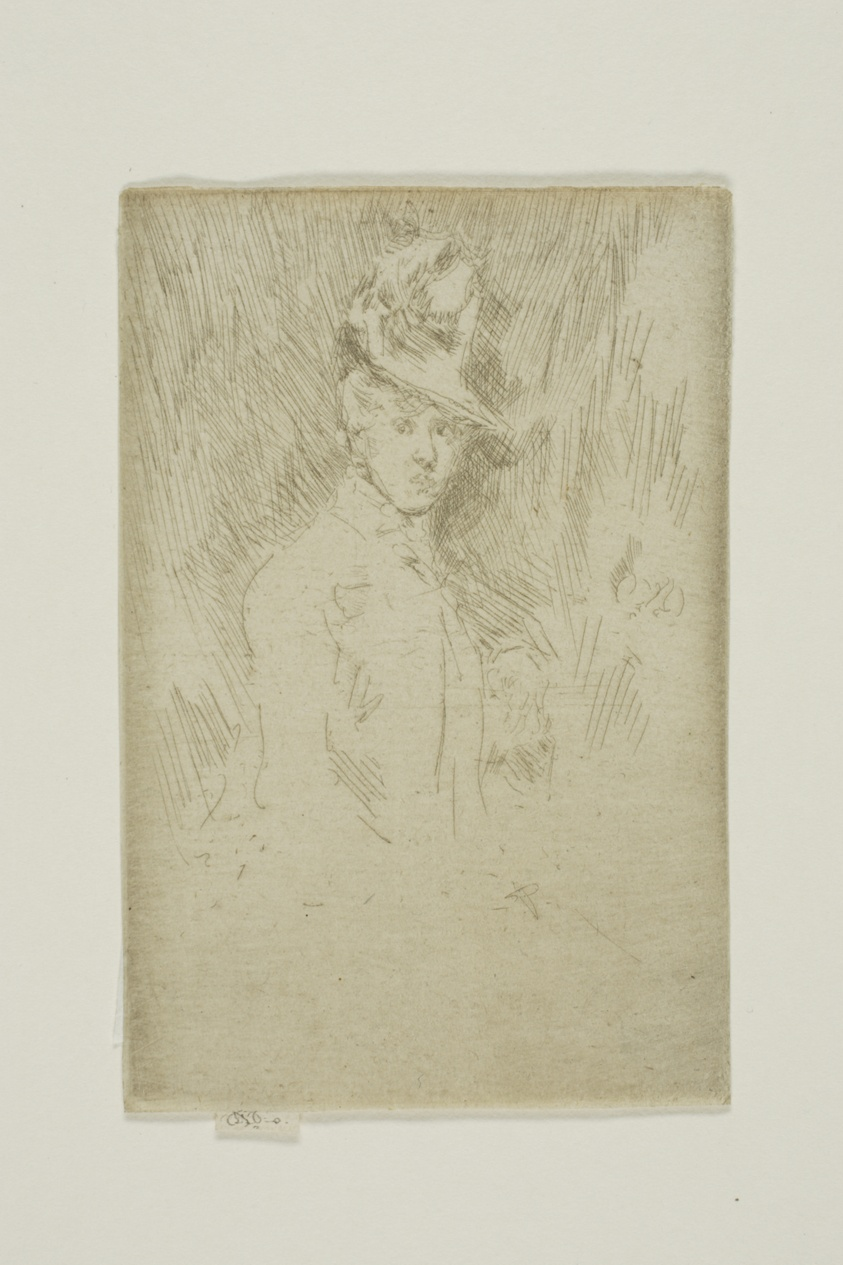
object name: Print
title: The Little Hat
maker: James McNeill Whistler (American, 1834-1903)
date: 1887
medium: Etching and drypoint in brown ink on ivory laid paper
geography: United States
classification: etching; drypoint; print; prints and drawing; paper